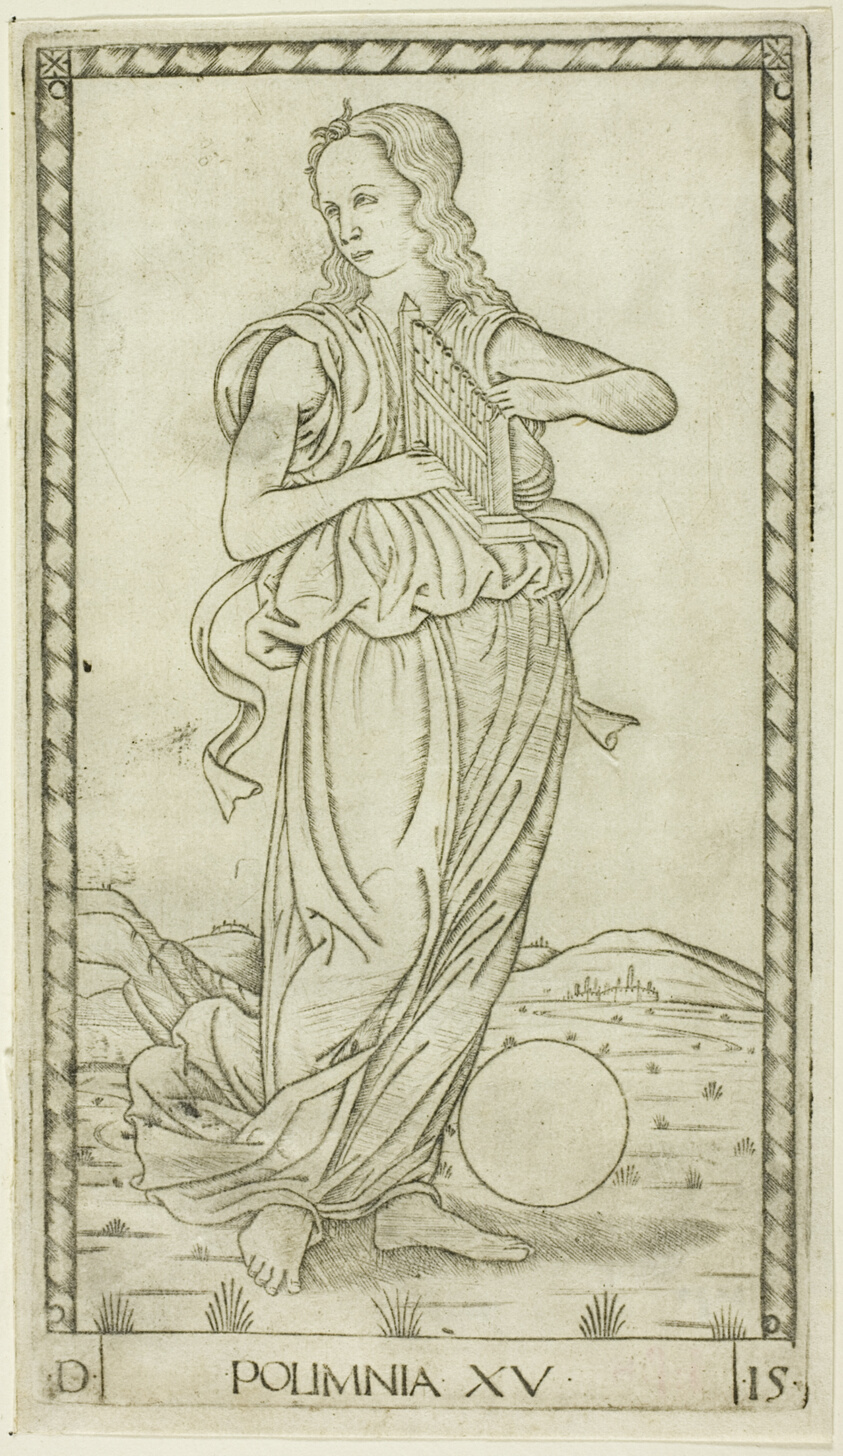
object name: Print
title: Polyhymnia, plate fifteen from Apollo and the Muses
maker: Master of the E-Series Tarocchi (Italian, active c. 1465)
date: c. 1465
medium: Engraving on paper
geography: Italy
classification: engraving; print; prints and drawing